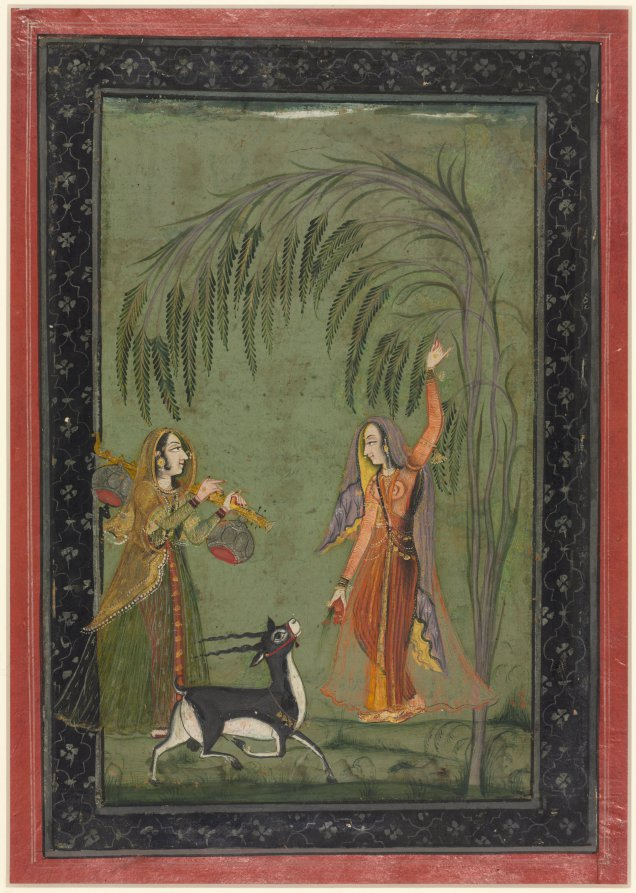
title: Todi Ragini, from a Ragamala Series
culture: Northwestern India, Rajasthan, Bundi or Uniara, 18th century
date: c. 1750–75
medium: Gum tempera and gold on paper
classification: Painting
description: In the ragamala system, male ragas are "married" to female raginis. Todi Ragini is a "wife" of Hindola Raga, the name of a scene that features the male lover or lovers on a swing. Both Todi and Hindola are meant to explore the moods of springtime. Ragamala verses describe Todi as a woman with sharp eyes and a slim "extremely tender body, radiant as the frost" and smeared with saffron and camphor from Kashmir. She is said to "push back a deer from the edge of a forest glade."